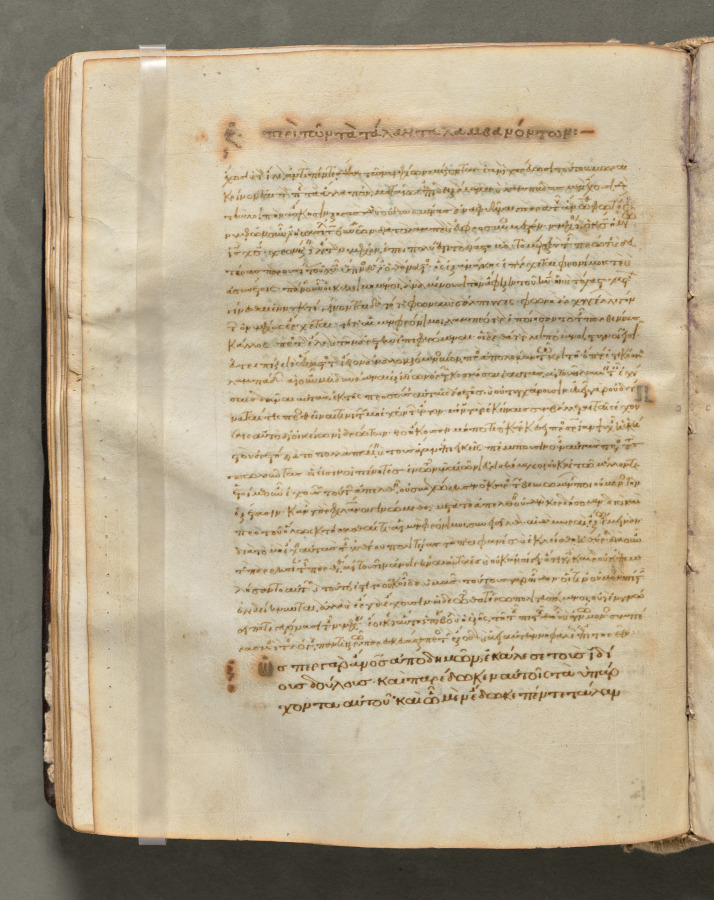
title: Text, folio 110 (verso), from a Gospel Book with Commentaries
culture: Byzantium, Constantinople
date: c. 1000–1100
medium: ink, tempera, and gold on vellum; leather binding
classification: Bound Volume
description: Each of the four gospels in this book opens on a page with brilliantly illuminated borders depicting the author of the text as well as birds-principally peacocks, symbols of the immortality of the soul-and fountains, representing the fountain of life and the salvation of the soul. This volume consists of 428 leaves with texts in Greek. Its level of sophistication suggests that it was probably written and decorated in a monastery in Constantinople.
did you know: Gospel Books were carried in procession through Byzantine churches.